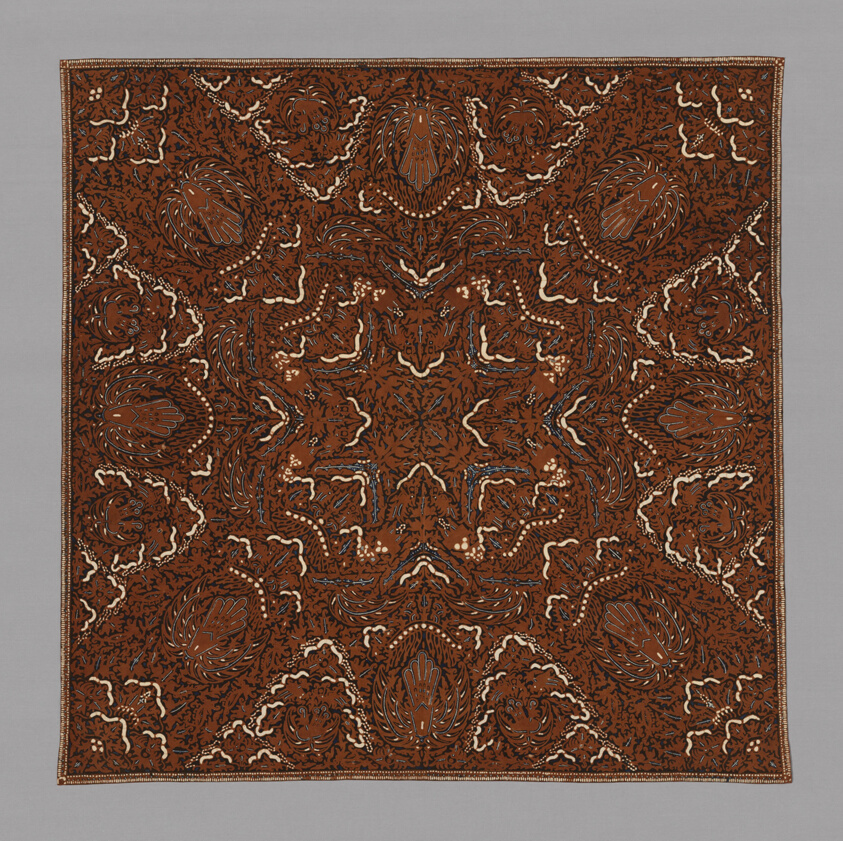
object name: Costume and Accessories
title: Headcloth (Iket Kepala)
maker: Indonesia, Central Java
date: Late 19th century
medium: Cotton, plain weave; hand-drawn wax resist dyed (batik tulis)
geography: Java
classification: textile; weaving; costume; dress (garment); clothing